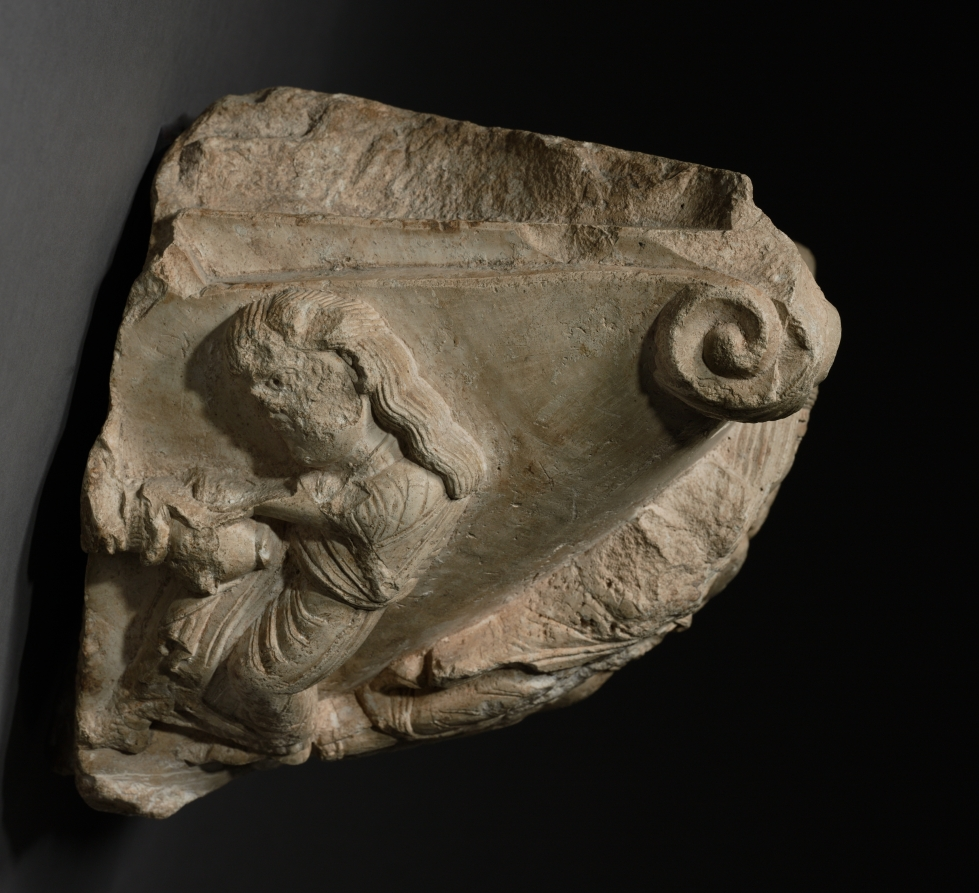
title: Fragment of a Capital with Scenes from Mary’s Infancy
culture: South Italy, Apulia, early 12th Century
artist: workshop of The Cathedral of Monopoli (Italian)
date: early 1100s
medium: fine-grained limestone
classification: Sculpture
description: This sculpture relates stylistically with architrave figures from the facade of Monopoli’s cathedral. It is especially similar to a capital there featuring the prophet Daniel. The figure pouring water on the left probably represents an attendant in the Birth of the Virgin. The remaining figures depict the subject of the Presentation of the Virgin in the Temple. Their exquisite sculptural character gives this fragment major importance in the study of Romanesque sculpture in Apulia.